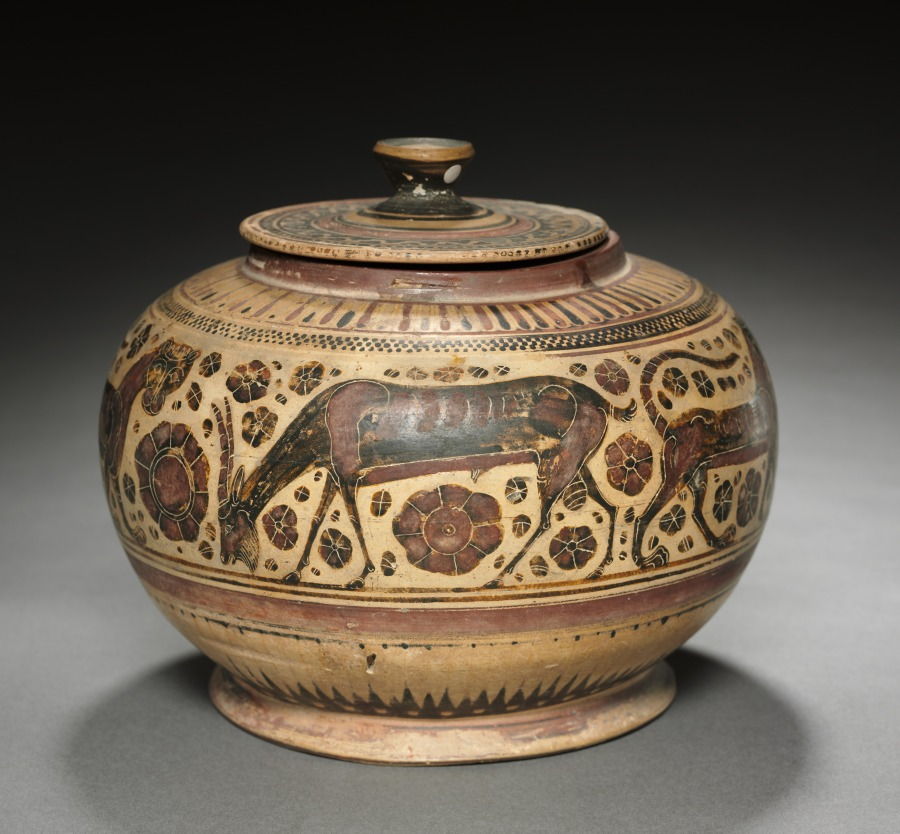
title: Black-Figure Pyxis (Cylindrical Lidded Box): Animals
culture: Greek, Corinthian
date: 600s–500s BCE, with modern painting and incision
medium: ceramic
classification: Ceramic